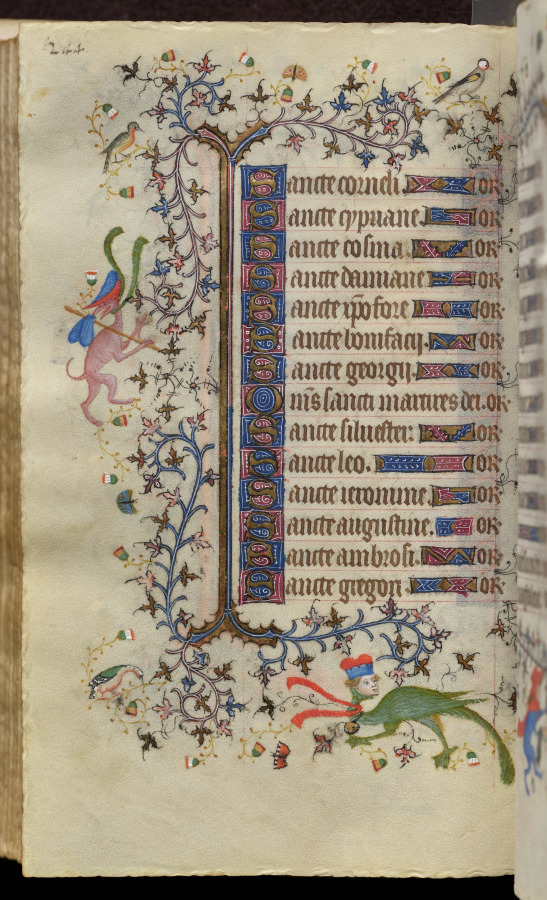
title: Hours of Charles the Noble, King of Navarre (1361-1425): fol. 122v, Text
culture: France, Paris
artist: Master of the Brussels Initials and Associates (French)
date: c. 1405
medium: ink, tempera, and gold on vellum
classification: Bound Volume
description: This precious volume was obviously highly prized by its owner, the French-born King of Navarre, who had his coat of arms painted on no less than twenty folios. Rather than directly commissioning this manuscript from a specific workshop, it seems that Charles the Noble acquired his book of hours -- perhaps ready-made for the luxury market -- while on a trip to Paris in 1404-05. A collaborative effort, six painting styles are evidenced within the pages of this codex, those of two Italians, two Frenchmen, and two Netherlanders. The painter who was responsible for the planning and decoration of the book, and who produced seventeen of the large miniatures, was a Bolognese artist known as the Master of the Brussels Initials. His principal assistant, responsible for most of the borders, was a Florentine who signed his name "Zecho" da Firenze on folio 208 verso.